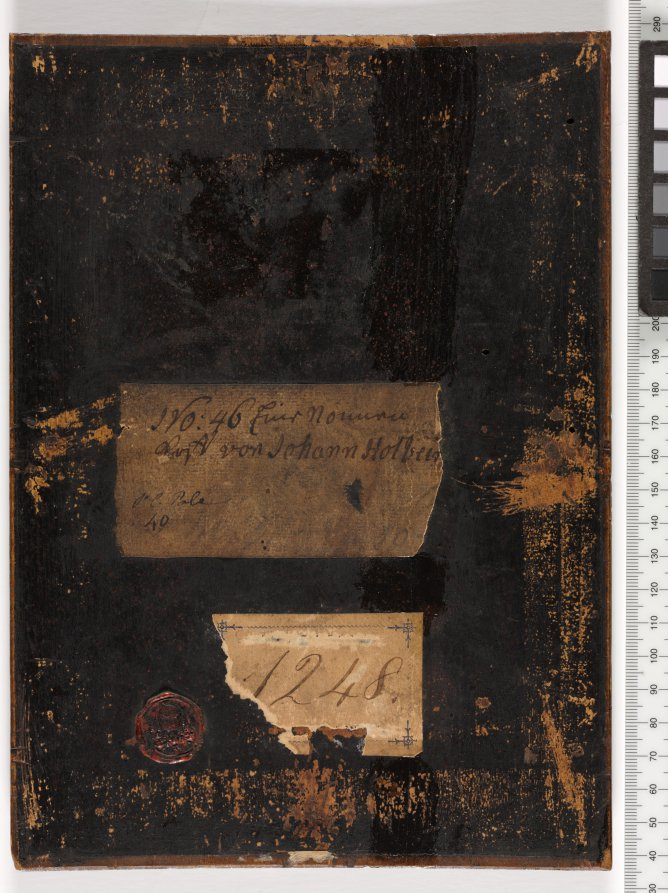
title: Portrait of a Woman, Possibly a Novice of San Secondo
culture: Italy, 15th century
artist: Jacometto Veneziano (Italian, 1497)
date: c. 1490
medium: oil on wood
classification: Painting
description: Scholars have recently speculated that this work does not actually depict a nun, although it has been described as such since 1543. A beautiful young woman presented as saintly, a regular occurrence, the sitter may be the wife or daughter of Alvise Contarini. Her attire, particularly the head garb, may be secular, while some scholars consider it to be Benedictine or Dominican. The San Secondo convent was reserved for daughters of the wealthiest Venetians and conventions of dress were fairly loose until 1515 when strict reforms were enforced by religious and political authorities in Venice.